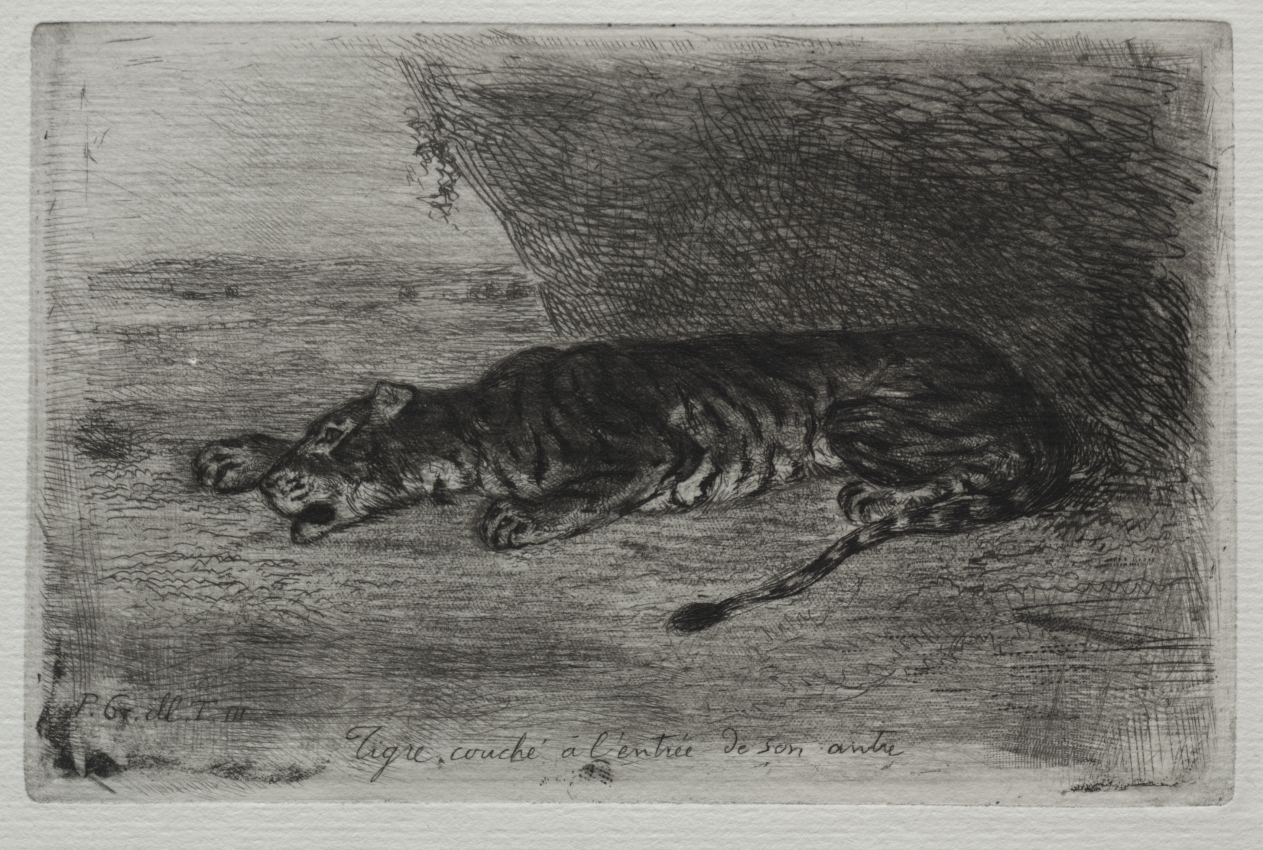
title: Tiger Sleeping at the Entrance to His Lair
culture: France, 19th century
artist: Eugène Delacroix (French, 1798–1863)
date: c. 1828–30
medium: etching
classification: Print